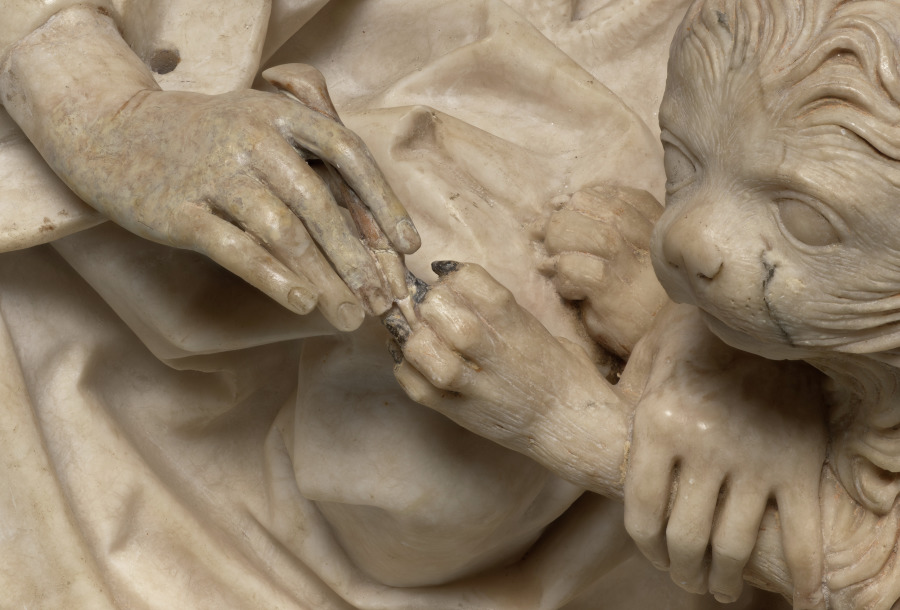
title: Saint Jerome and the Lion (From the former Church of St. Peter in Erfurt)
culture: Germany, Würzburg, late 15th Century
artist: Tilman Riemenschneider (German, active Würzburg, c. 1460–1531)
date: c. 1495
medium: alabaster, traces of polychromy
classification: Sculpture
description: According to legend, Saint Jerome (347–420 bce) lived in the desert, where he removed a thorn from an injured lion. Jerome is venerated in the Catholic Church as a Church Father, an important early author of Christianity. Here, he wears cardinal’s clothing from around 1500. Tilman Riemenschneider focused on Jerome’s relationship with the lion, creating empathy for the wounded animal. The delicacy of the depiction, which may have been partially painted to add highlights, is typical of alabaster, as is its fine polishing. The cord of the cardinal’s hat, missing today, may have been supplemented from another material.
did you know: In the story Saint Jerome encounters a fearsome lion, here depicted as diminutive, gentle, and submissive.